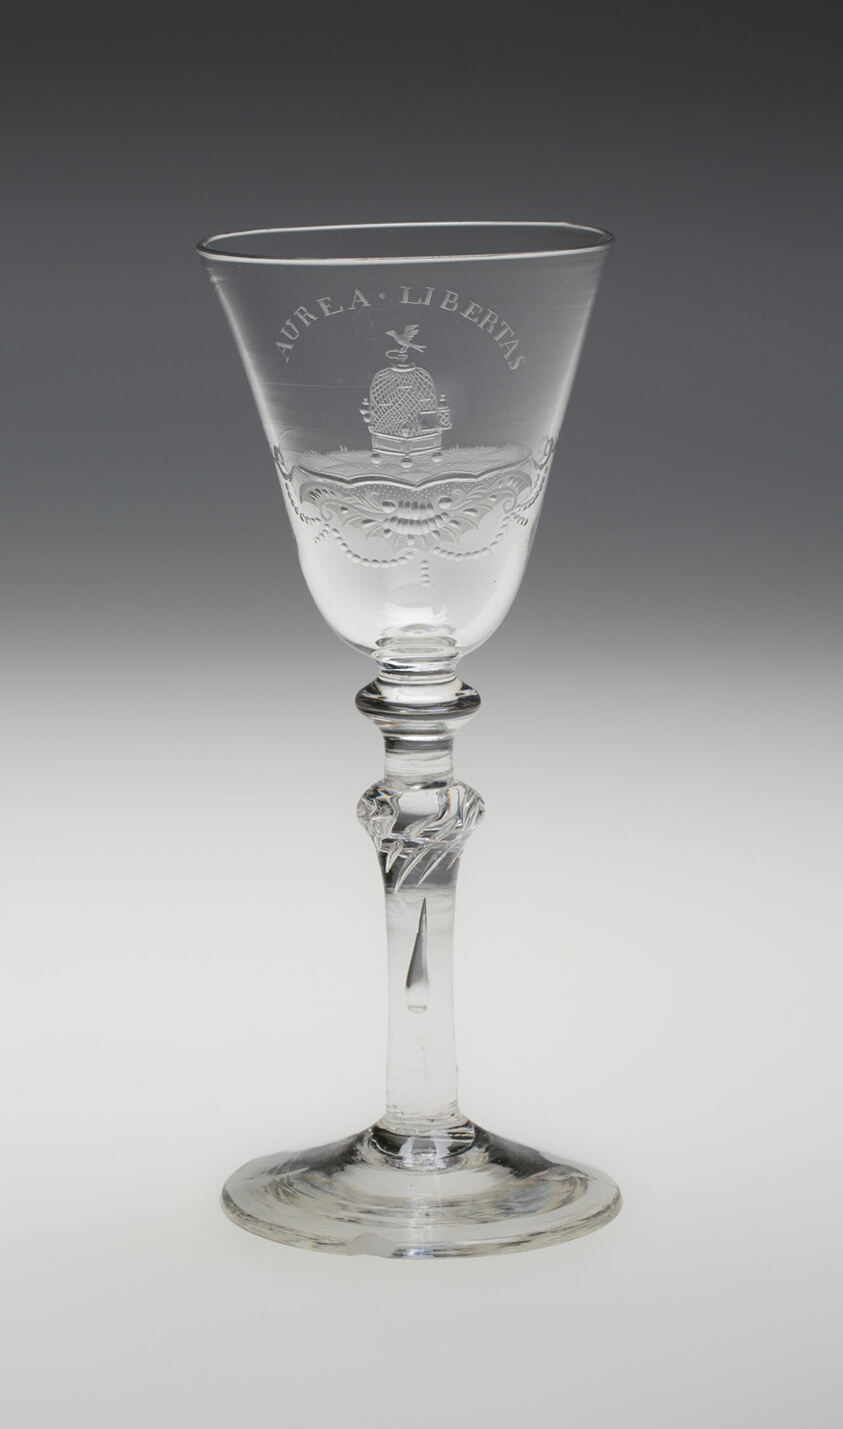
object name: Glass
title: Wine Glass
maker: England, Newcastle upon Tyne; Engraved in the Netherlands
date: c. 1750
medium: Glass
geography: England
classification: drinking vessel; european decorative arts; glass